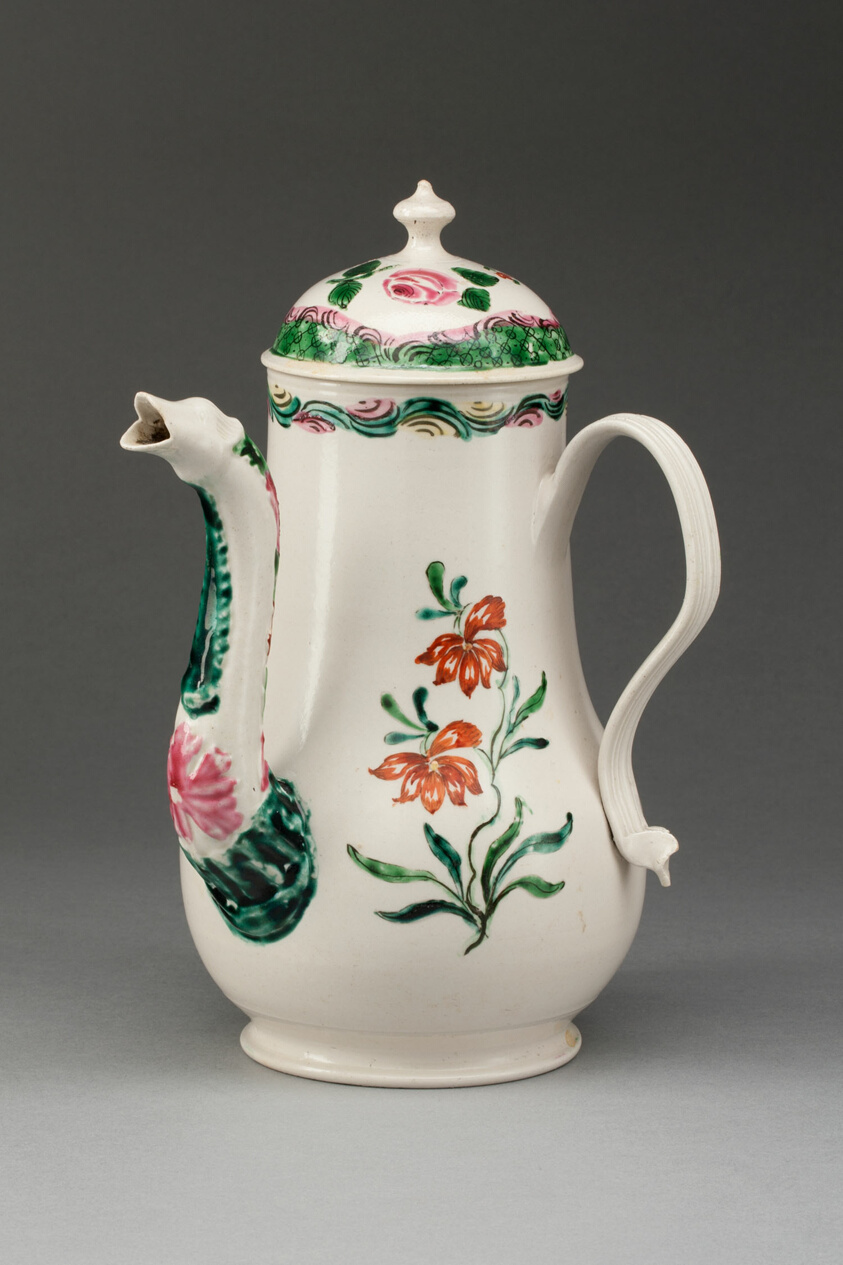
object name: Ceramics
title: Chocolate Pot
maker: Staffordshire, England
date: c. 1760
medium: Salt-glazed stoneware, polychrome enamels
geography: Staffordshire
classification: salt-glazed stoneware; european decorative arts; ceramics; stoneware